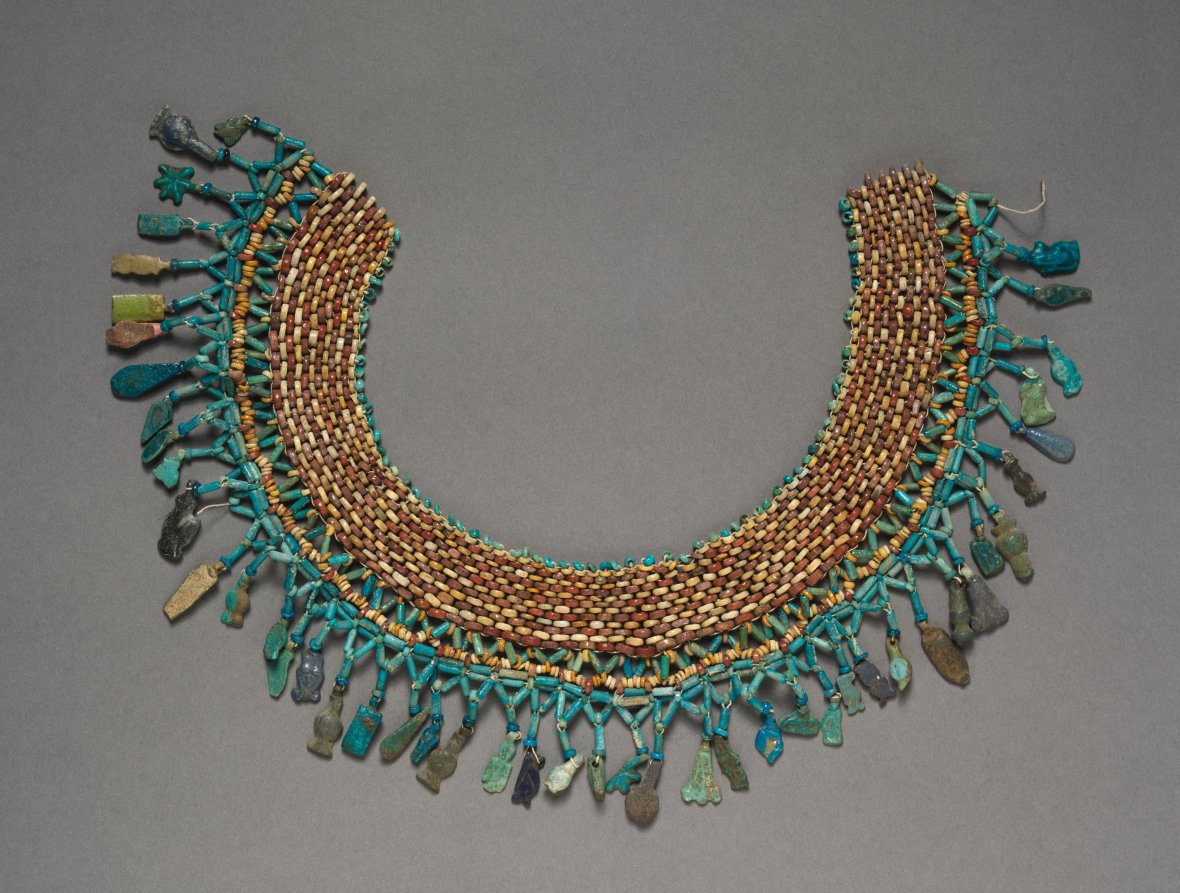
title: Broad Collar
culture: Egypt, Style of late Dynasty 18 but essentially modern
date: 1900–1916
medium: faience, glass, and stone, modern stringing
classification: Jewelry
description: Jewelry, an important element of ancient Egyptian culture, encompassed a variety of materials, such as glass, gems, and precious substances, including faience and other ceramics. Some ancient Egyptian jewelry helped provide spiritual protection in life and death, most notably scarab amulets, which represent Khepri, the early morning sun god connected with resurrection. As seen in the silhouettes of both Chanel necklaces, the wesekh, or broad-collar necklace, is often referenced in modern and contemporary fashion. This was donned by members of the ancient Egyptian elite and often shown in depictions of deities, highlighting the hierarchy of access to such fine jewelry.